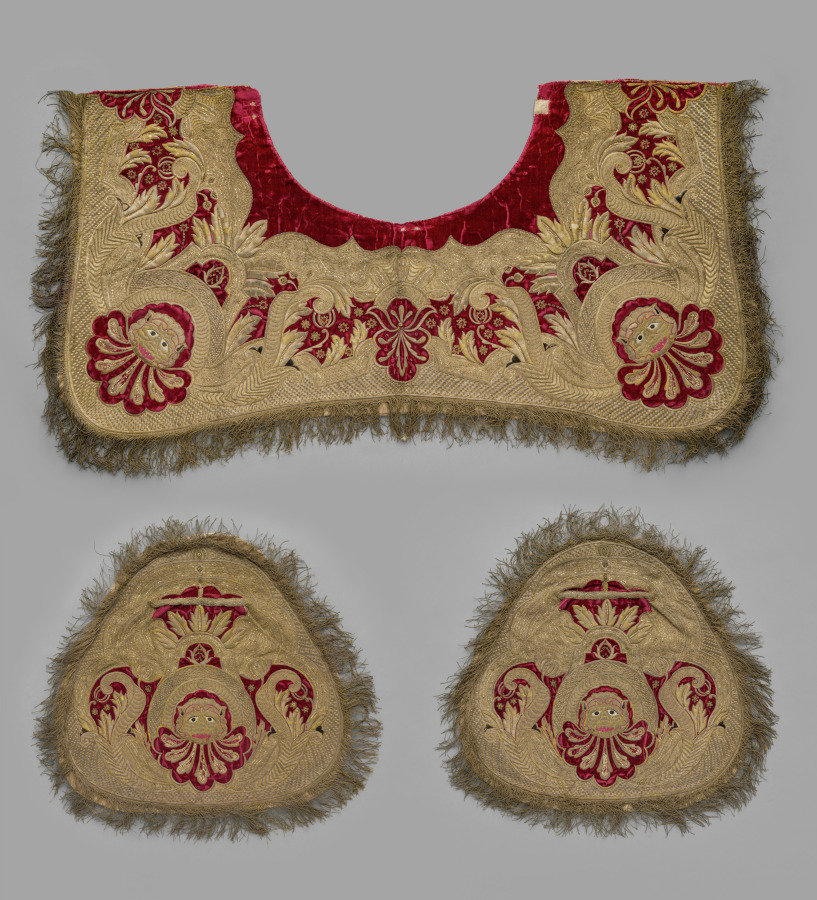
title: Gold Embroidered Saddle Ornament and Pistol Covers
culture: Spain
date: 1700s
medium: embroidery; gold metallic thread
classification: Embroidery